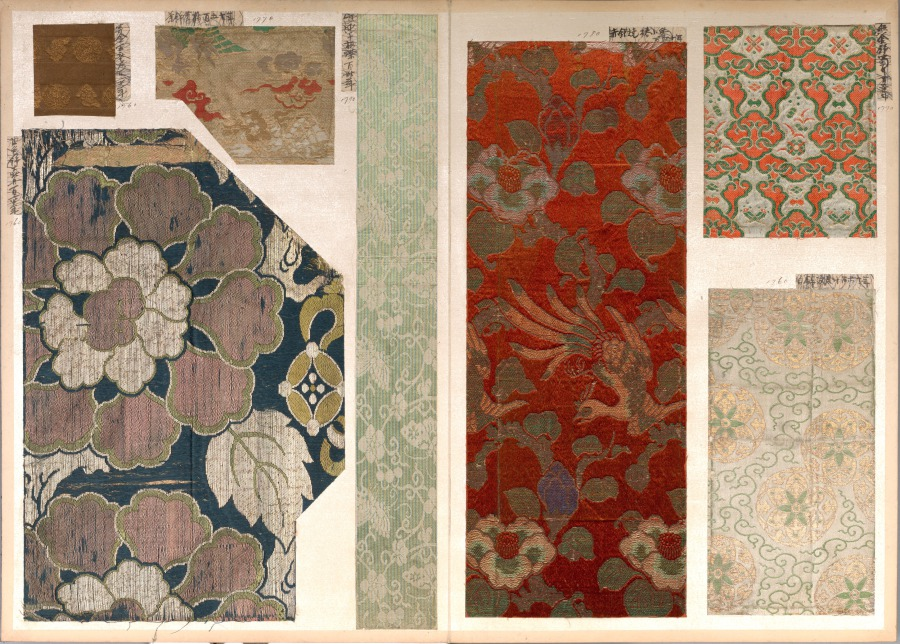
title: Album of Textile Samples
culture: Japan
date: 1790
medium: silk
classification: Textile